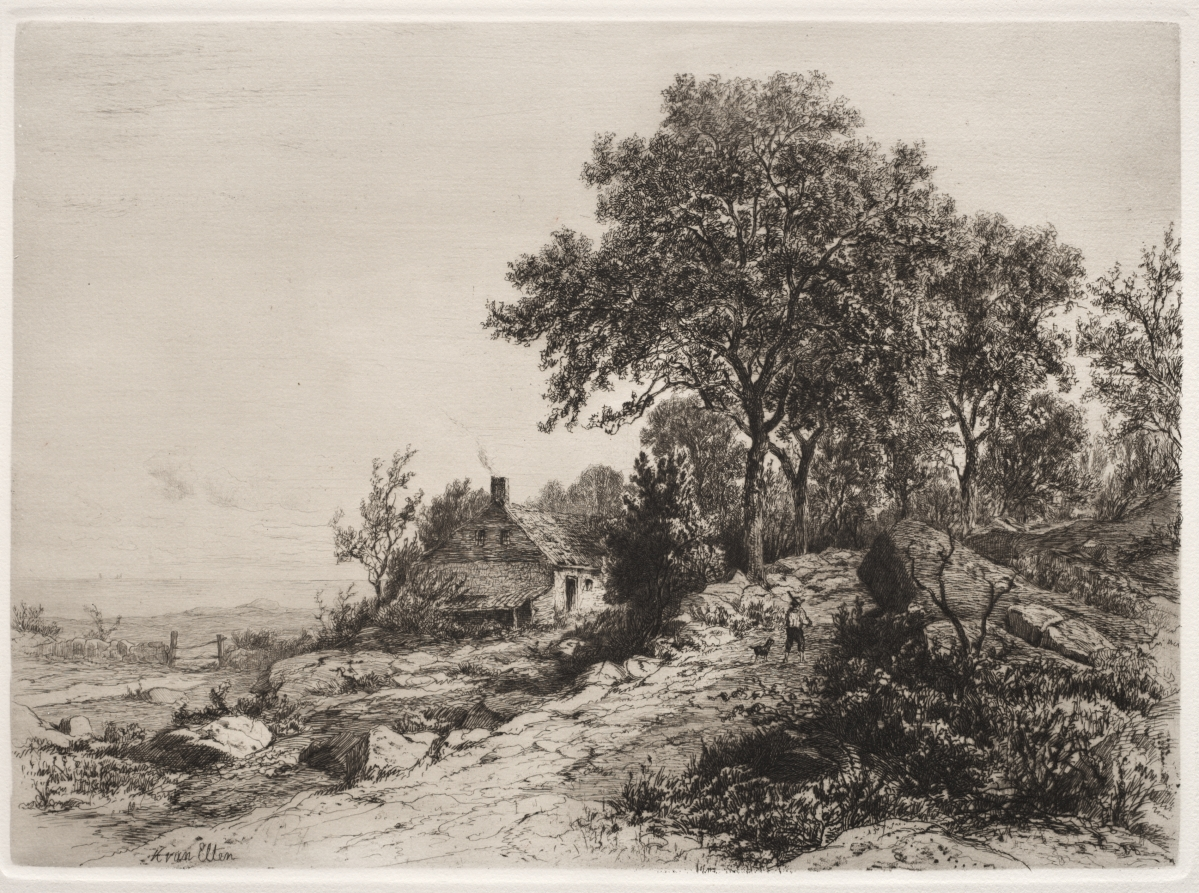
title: Cottage by the Sea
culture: America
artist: Hendrik Dirk Kruseman van Elten (American, born The Netherlands, 1829–1904)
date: c. 1885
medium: etching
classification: Print